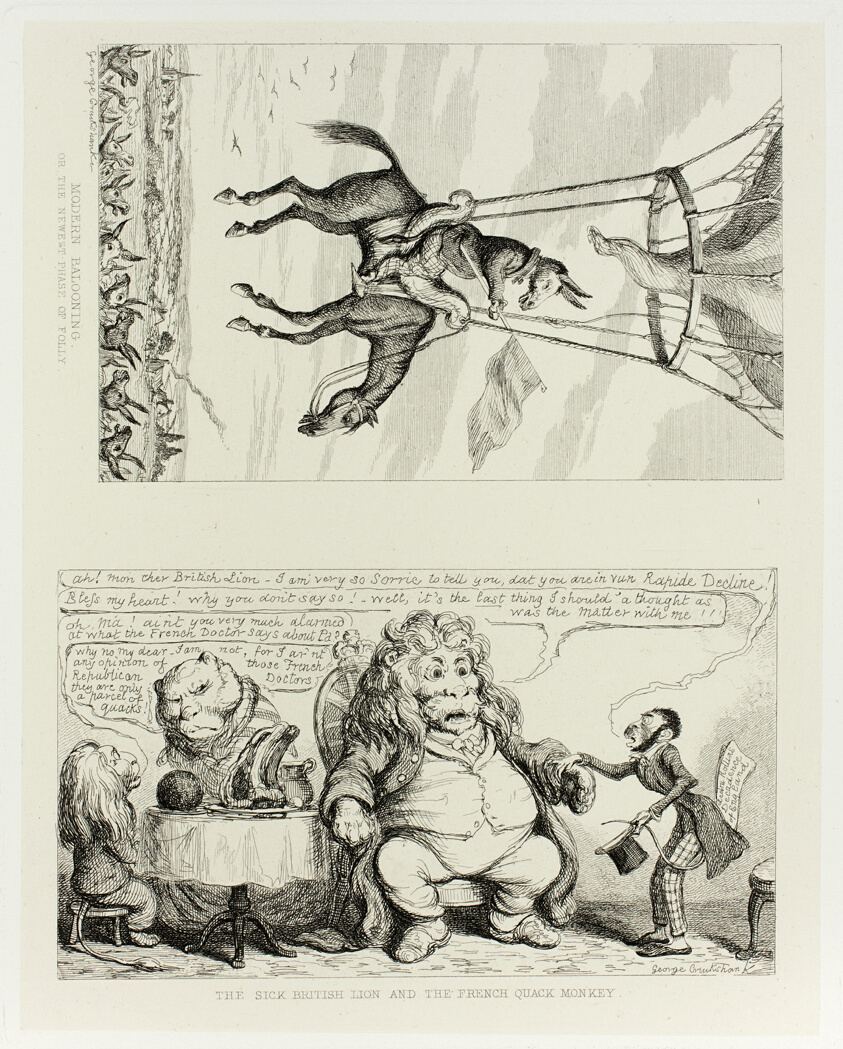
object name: Print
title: Modern Ballooning, or the Newest Phase of Folly from George Cruikshank's Steel Etchings to The Comic Almanacks: 1835-1853 (top)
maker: George Cruikshank (English, 1792-1878); published by Pickering & Chatto (English, 19th century)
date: 1851, printed c. 1880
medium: Two steel etchings in black on cream India paper, laid down on off-white card (chine collé)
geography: England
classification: print; prints and drawing